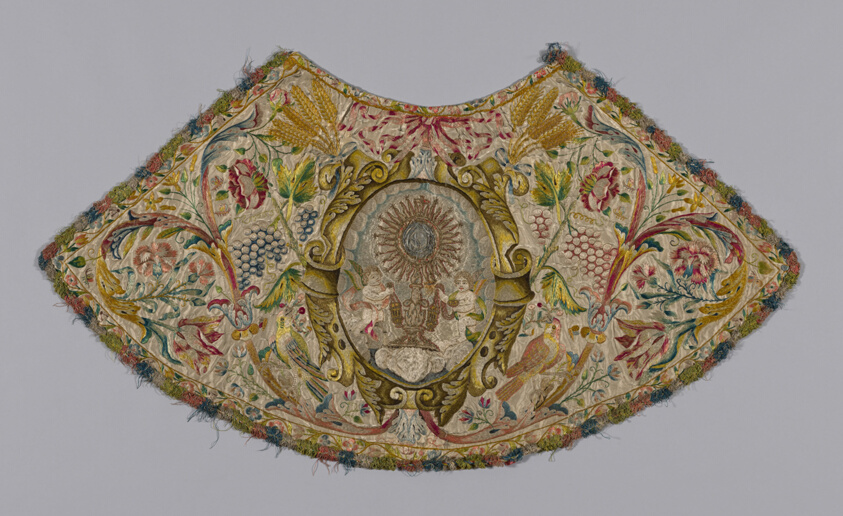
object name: Costume and Accessories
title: Dress for Christ Child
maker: Spain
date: 18th century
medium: Silk, satin weave, embroidered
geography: Spain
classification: textile; costume - embroidery; needlework (visual works); costume